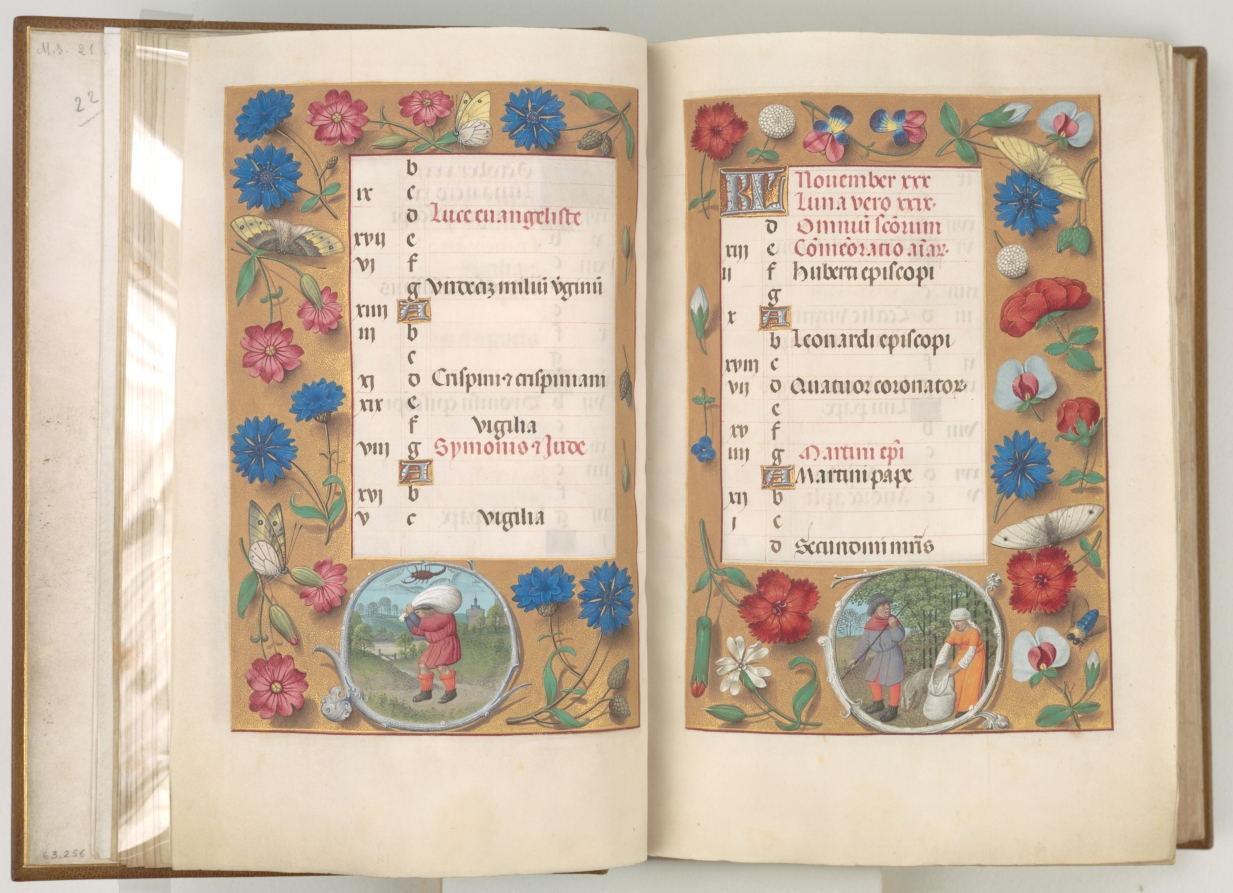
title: Hours of Queen Isabella the Catholic, Queen of Spain: Fol. 11v, October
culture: Flanders, Ghent and Bruges, late 15th century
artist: Master of the First Prayerbook of Maximillian (Flemish, c. 1444–1519)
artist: and Associates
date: c. 1500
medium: ink, tempera, and gold on vellum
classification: Bound Volume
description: This manuscript was illuminated by a circle of at least five highly organized manuscript painters active in the Flemish cities of Ghent and Bruges. The principal illuminator was Alexander Bening, who painted the majority of the book's miniatures. Manuscripts produced by this circle of artists are renowned for the decoration of their borders, which typically feature a rich variety of realistically-painted flowers, birds, and butterflies. This prayer book, called a book of hours, was intended not for a cleric, but for the private devotions of a lay person-in this case, Isabella the Catholic, Queen of Spain (1451-1504). Isabella's coat of arms embellishes the book's frontispiece. It is unlikely that the book was commissioned by the Queen herself; rather, she probably received it as a diplomatic gift from someone courting her patronage, perhaps Cardinal Francisco Jimenez de Cisneros. A Franciscan friar, Jimenez was dependent upon Isabella for his advancement, first to the post of Queen's confessor in 1492, and then to Archbishop of Toledo in 1495.